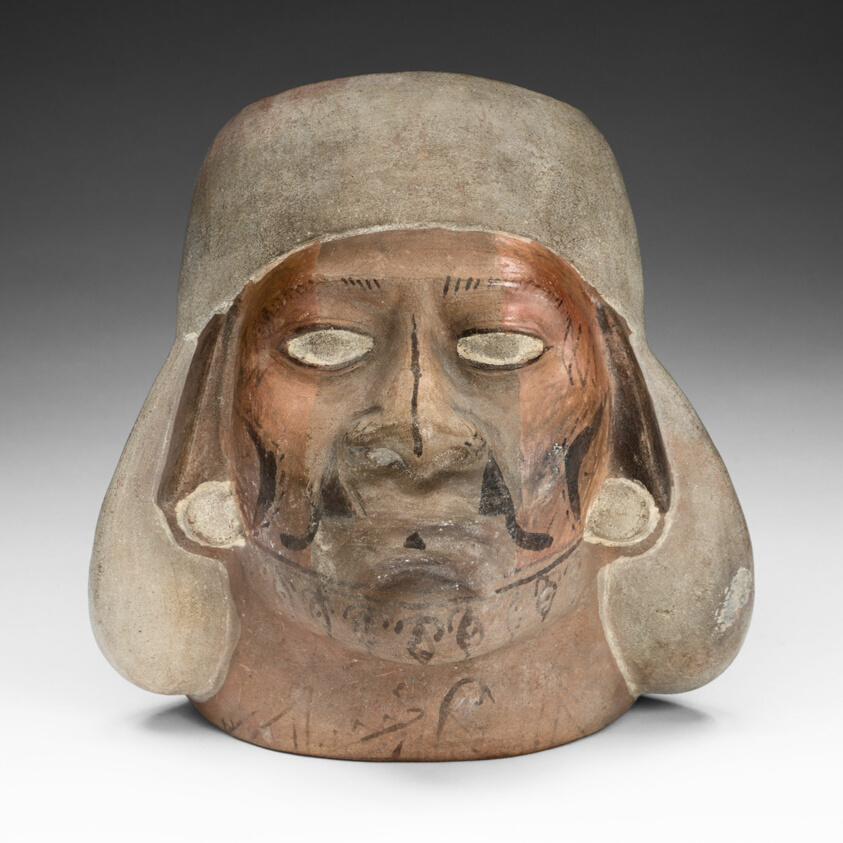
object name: Vessel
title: Portrait Vessel of a Young Man with a Scarred Lip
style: moche, mochica, early intermediate period, Pre-Columbian, americas, andes, Arts of the Americas, andean, south american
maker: Moche (North coast, Peru)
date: 100 BCE–500 CE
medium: Ceramic and pigment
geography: Peru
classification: art of the americas; vessel; ceramics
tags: people, portraits